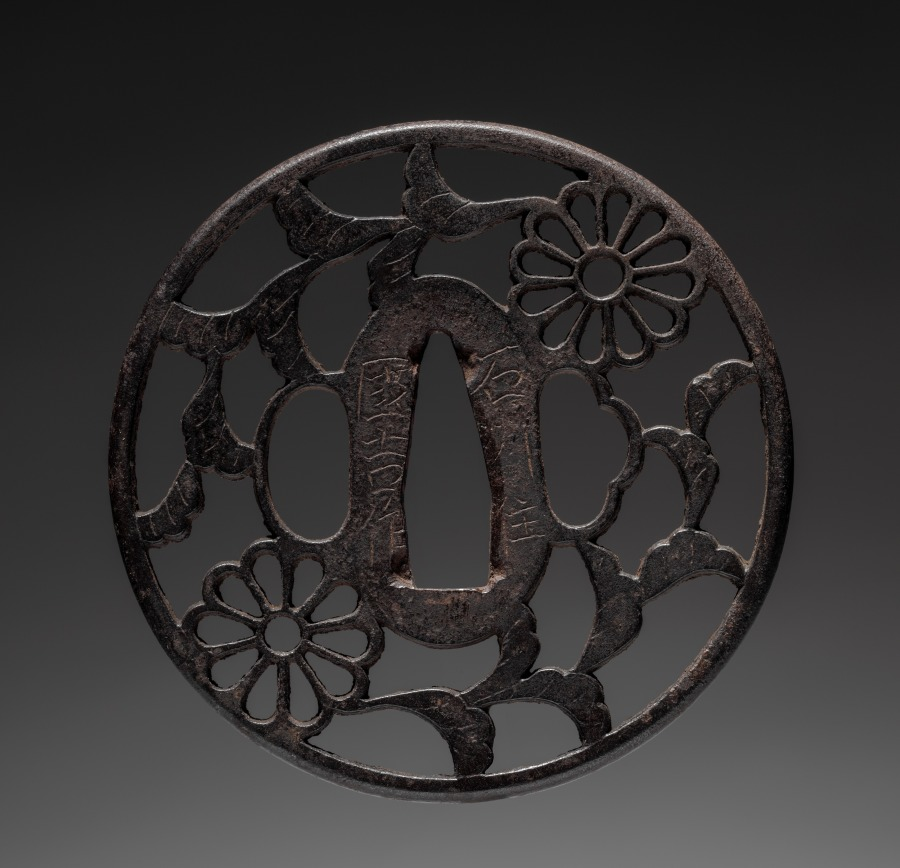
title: Sword Guard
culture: Japan, Edo period (1615–1868)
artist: Kuniyoshi (Japanese)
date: late 1600s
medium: iron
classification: Arms and Armor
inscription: Signature: Kuniyoshi, residing in Iwami province, made